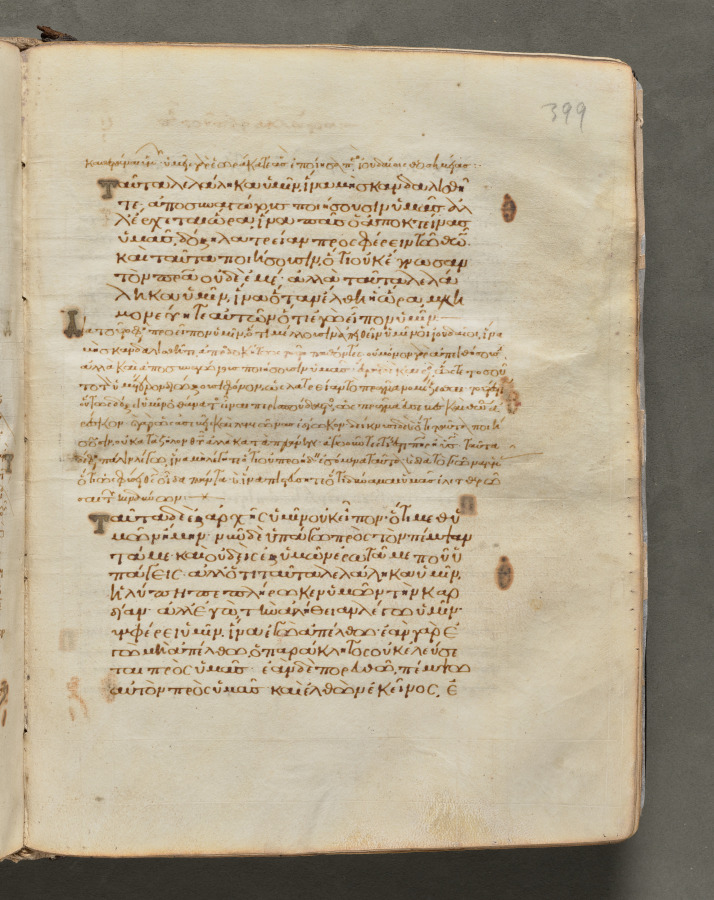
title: Text, folio 399 (recto), from a Gospel Book with Commentaries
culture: Byzantium, Constantinople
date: c. 1000–1100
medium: ink, tempera, and gold on vellum; leather binding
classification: Bound Volume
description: Each of the four gospels in this book opens on a page with brilliantly illuminated borders depicting the author of the text as well as birds—principally peacocks, symbols of the immortality of the soul—and fountains, representing the fountain of life and the salvation of the soul. This volume consists of 428 leaves with texts in Greek. Its level of sophistication suggests that it was probably written and decorated in a monastery in Constantinople.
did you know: Gospel books were carried in procession through Byzantine churches.